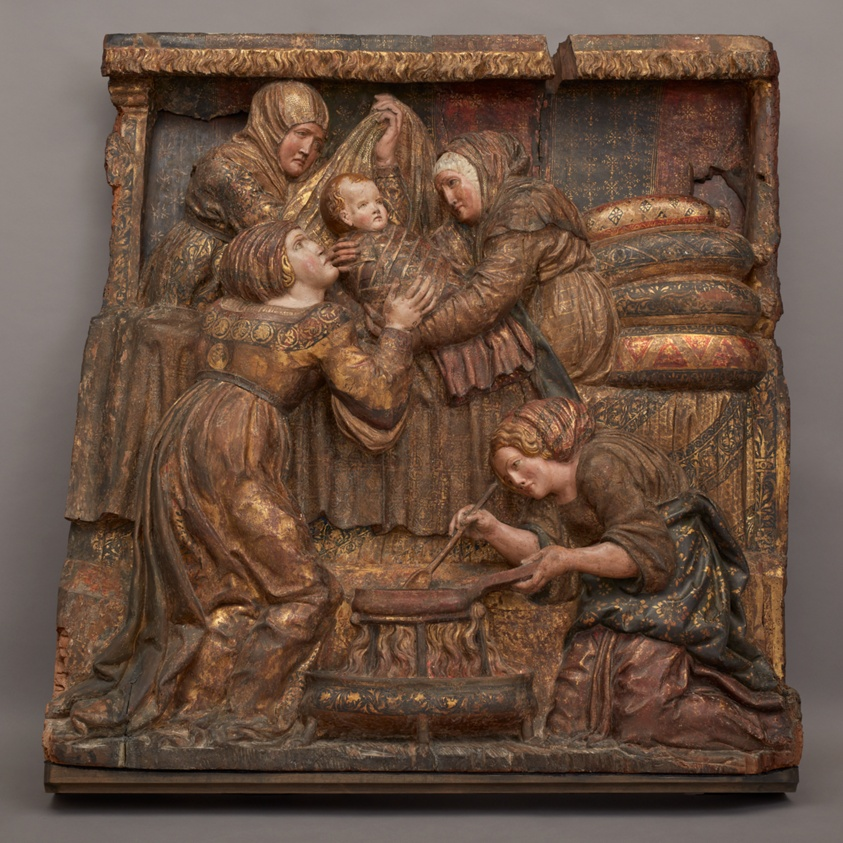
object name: Sculpture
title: The Birth of Saint John the Baptist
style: sixteenth century, 16th Century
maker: Artist unknown (Spanish (Burgos), active 16th century)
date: c. 1525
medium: Wood, polychromy, and gilding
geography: Spain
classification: relief; sculpture; sculpture/wood; spanish; wood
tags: religious scenes, bed, fire, women, woman, babies, birth, Christianity, Christian subjects, Saint John the Baptist, saints, religious figures, religious, religion